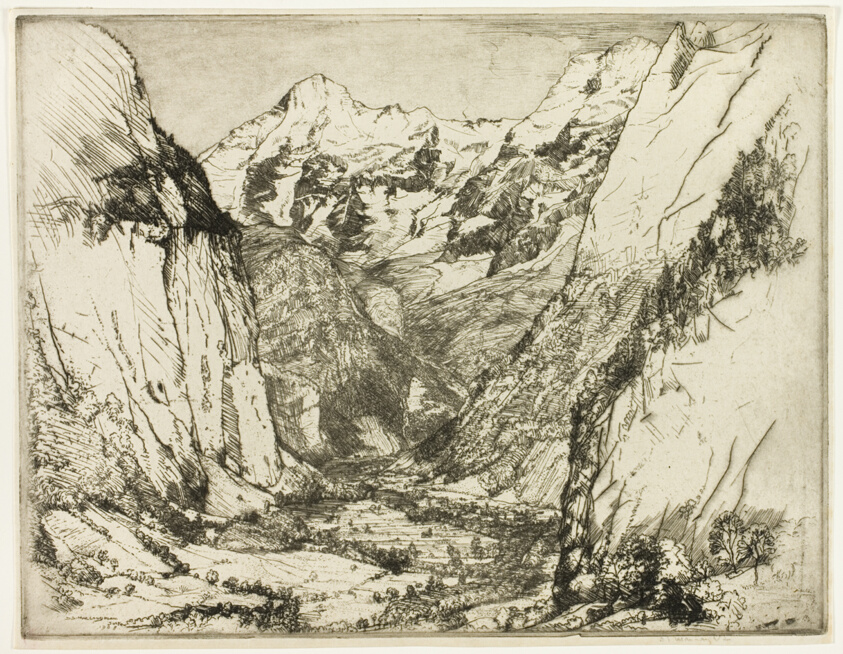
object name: Print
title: The Lauterbrunnen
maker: Donald Shaw MacLaughlan (American, born Canada, 1876-1938)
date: 1908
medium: Etching in black on ivory wove paper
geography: United States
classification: etching; print; prints and drawing